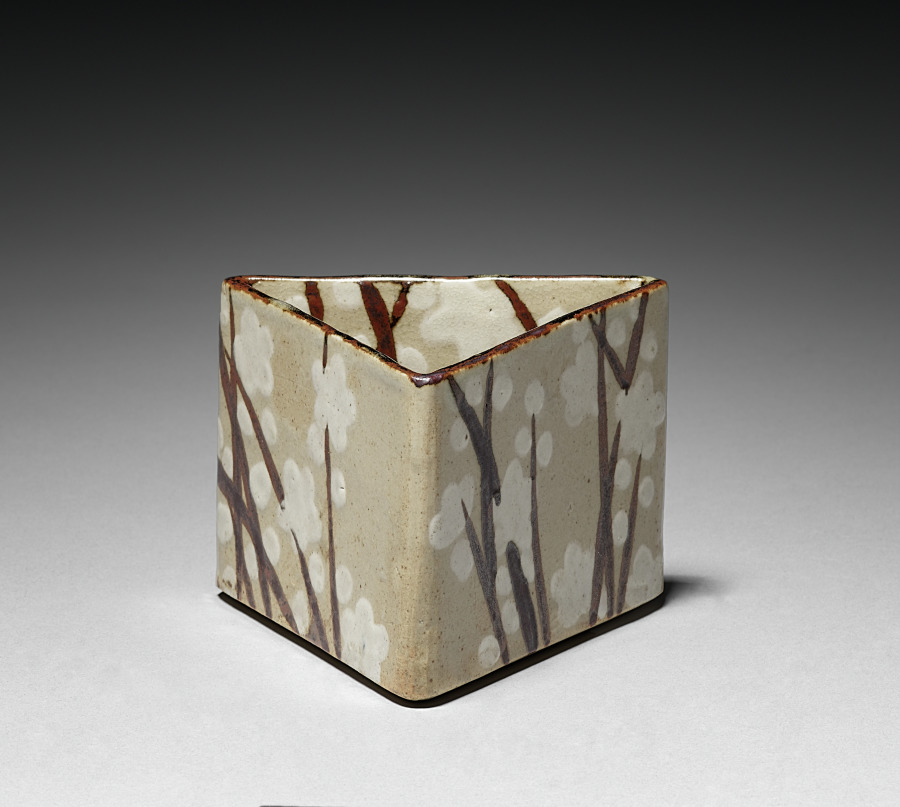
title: One of Five Serving Bowls (Mukozuke) with Prunus Design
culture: Japan, Edo period (1615–1868)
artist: school of Ogata Kenzan (Japanese, 1663–1743)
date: 1700s to mid-1800s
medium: Kyoto Ware: stoneware with underglaze iron oxide and slip decoration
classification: Ceramic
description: Note the rough, tan, clay bodies of these bowls with their deliberate irregularities. The design of branches was first painted in a black iron oxide, then the blossoms and buds in a white slip, followed by the application of a very thin transparent overglaze.